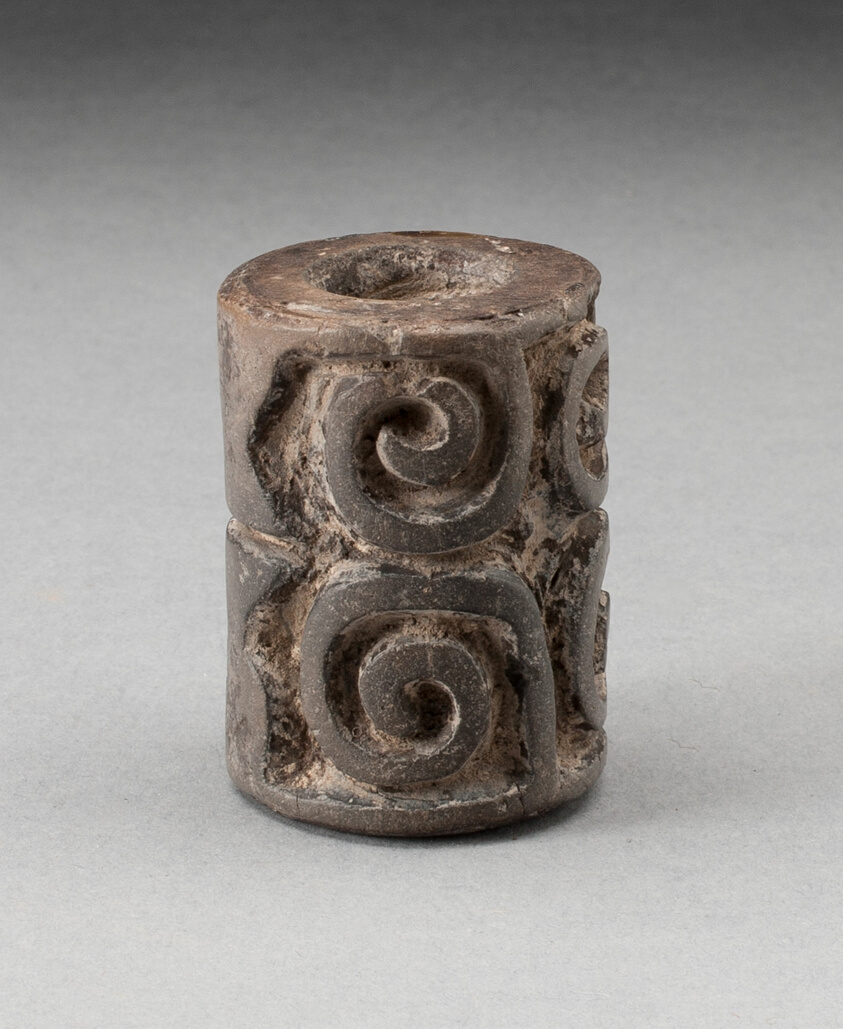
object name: Decorative Arts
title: Roller Seal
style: olmec, mesoamerican, Pre-Columbian, americas, Arts of the Americas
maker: Olmec (Veracruz or Tabasco, Gulf Coast, Mexico)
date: 800–400 BCE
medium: Ceramic and pigment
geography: Mexico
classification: blackware (black basaltes); american decorative arts; art of the americas; earthenware; ceramics; seal; decorative arts